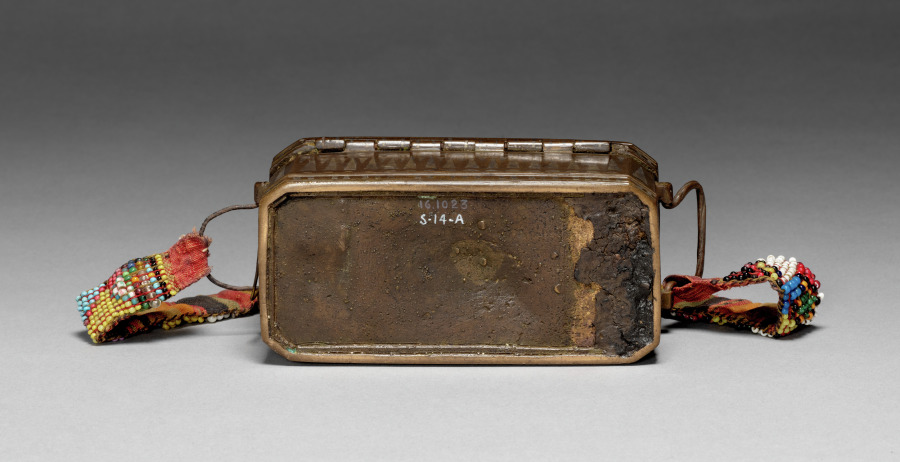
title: Betel nut container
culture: Philippines, Mindanao, most likely Maranao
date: 1800s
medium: Cast brass with silver inlays, weave fabric (handle), glass beads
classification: Arms and Armor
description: Chewing betel has been a social ritual common throughout Southeast Asia and Oceania for centuries. This betel nut container held the ingredients (areca nut, slaked lime, and betel leaves) used for this practice. The rectangular box, made of cast brass, is richly decorated with inlaid silver geometric motifs. It features a multicolored beaded strap with a pattern typical of the Bagobo people.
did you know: The beaded strap suggests portability; it may have been worn or suspended during social gatherings.